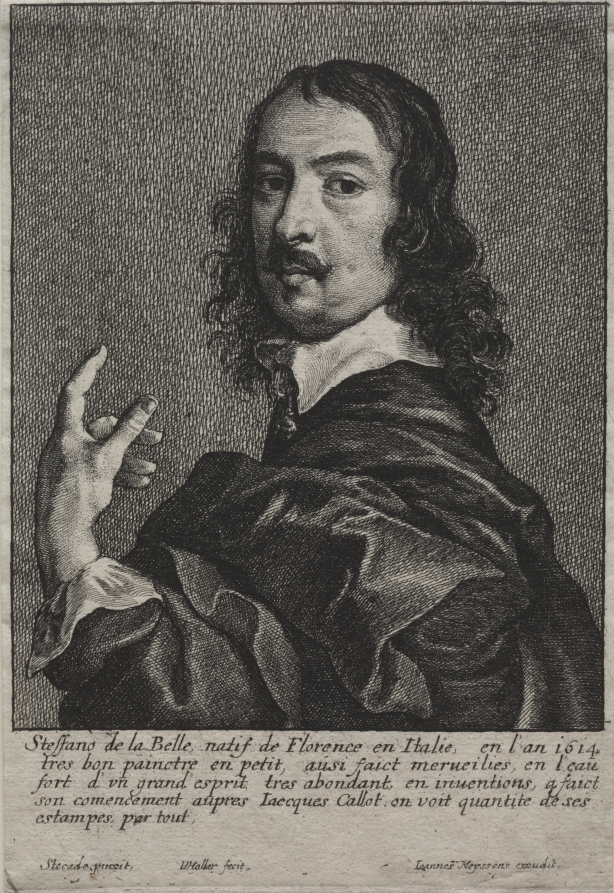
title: Portrait of Stefano della Bella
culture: Bohemia, 17th century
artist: Wenceslaus Hollar (Bohemian, 1607–1677)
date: 1649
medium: etching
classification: Print